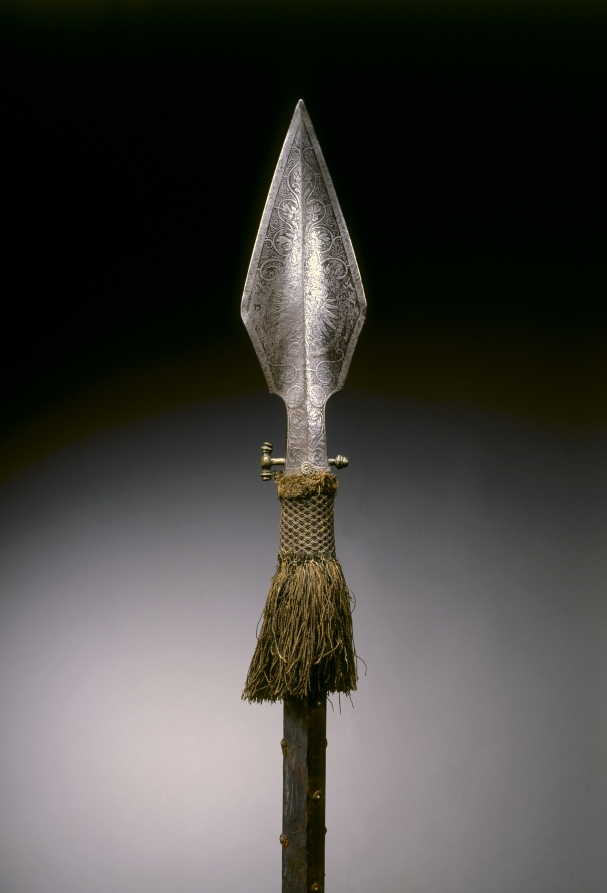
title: Parade Spear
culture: Germany, Augsburg?, 16th century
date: c. 1570–1600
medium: steel, etched; brass lugs; hexagonal wood haft with leather straps; woolen tassel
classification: Arms and Armor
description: This weapon is etched with the imperial Habsburg arms on one face and the Burgundian stave cross of St. Andrew on the other. In the 1500s, parade spears of this type became part of the insignia of infantry and light cavalry officers in the imperial army. In 1548 Titian painted an equestrian portrait of Emperor Charles V holding such a spear. At his abdication in 1556, Charles split the Habsburg inheritance between his son, Philip II of Spain, who was awarded control of Burgundy, and his brother, Frederick, who received the imperial title and the family's central European lands. This spear probably belongs to this later period and its purpose was likely ceremonial.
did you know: The Habsburg coat of arms, seen here, features a double-headed eagle.